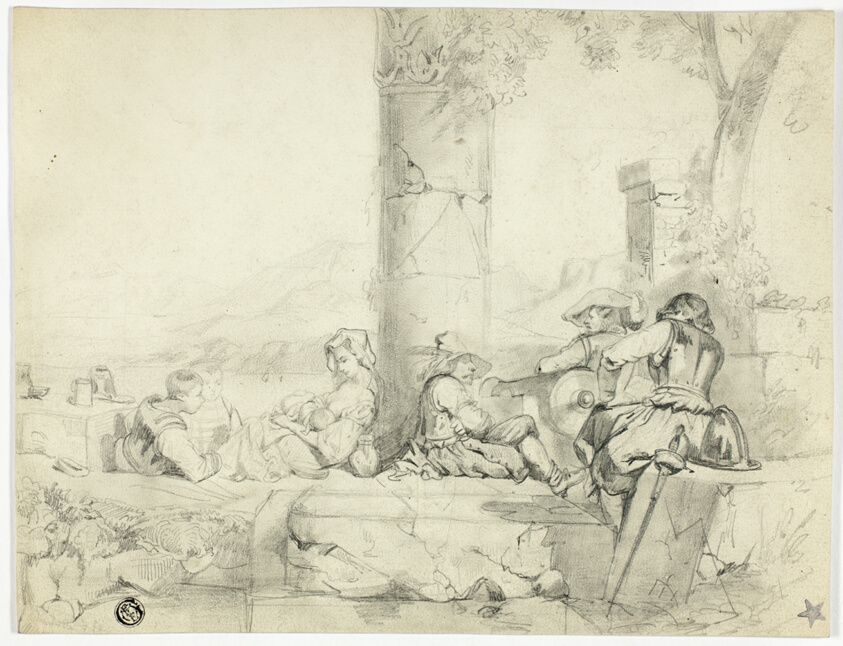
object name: Drawing and Watercolor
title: Children, Woman with Infant and Three Soldiers Sitting Among Ruins by Lake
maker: Attributed to George Cattermole (English, 1800-1868); or Penry Williams (Welsh, 1798-1885)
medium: Graphite with stumping on ivory wove paper, tipped onto ivory card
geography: England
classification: graphite; paper; drawings (visual works); prints and drawing